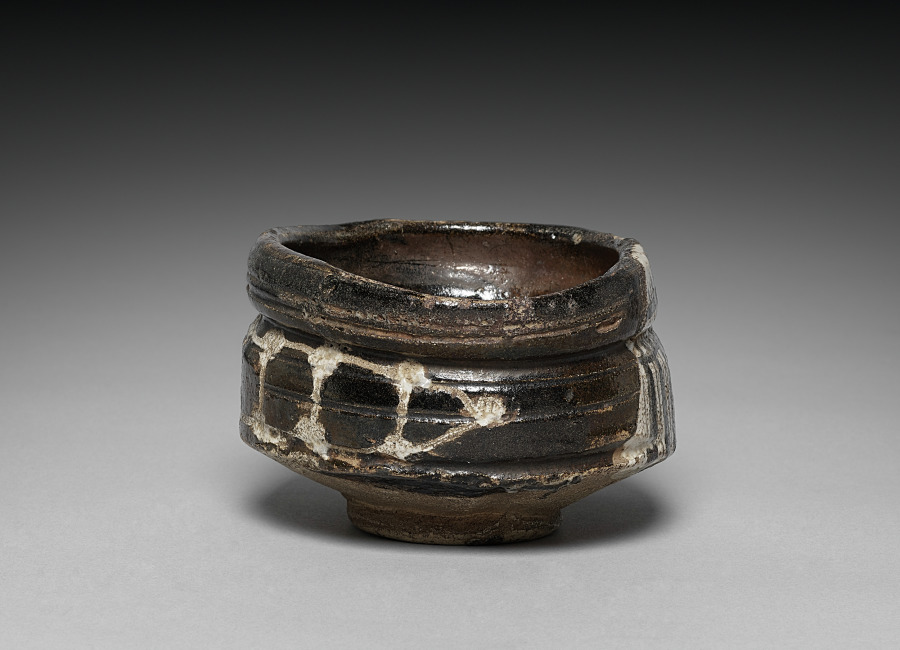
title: Clog-shaped Teabowl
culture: Japan, Momoyama period (1573–1615)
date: early 1600s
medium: Glazed stoneware (Mino ware, Oribe type)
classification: Ceramic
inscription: Mark: cross on base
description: Tea gatherings are fundamental to Japanese culture. Teabowls like this one are the most important objects used in tea practice. Its oblong shape and bold abstract designs are the signature style of the time period in which it was produced. That style is called Oribe, named for the tea master who championed the aesthetic.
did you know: Oribe is a government position. It means the person in charge of textiles.